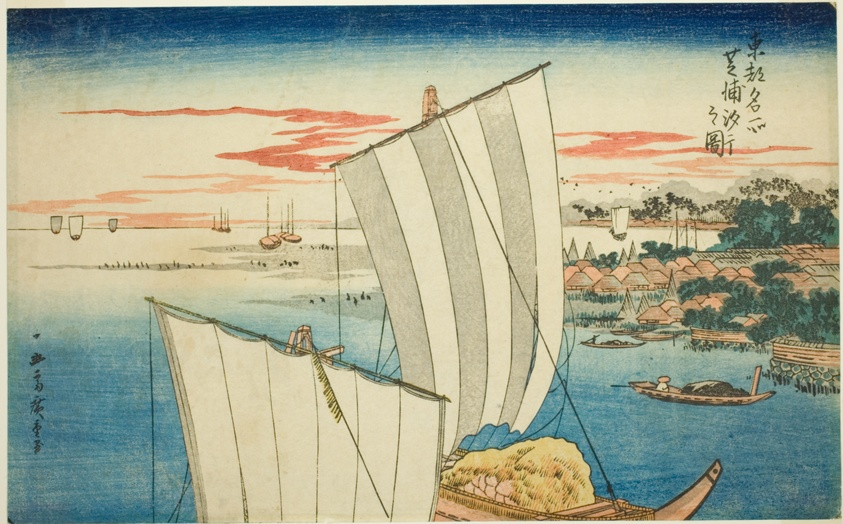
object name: Print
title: Low Tide at Shibaura (Shibaura shiohi no zu), from the series "Famous Views of the Eastern Capitol (Toto meisho)"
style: Japanese (culture or style)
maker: Utagawa Hiroshige 歌川 広重; Japanese, 1797-1858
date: c. 1831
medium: Color woodblock print; oban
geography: Japan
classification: woodblock print; print; asian art